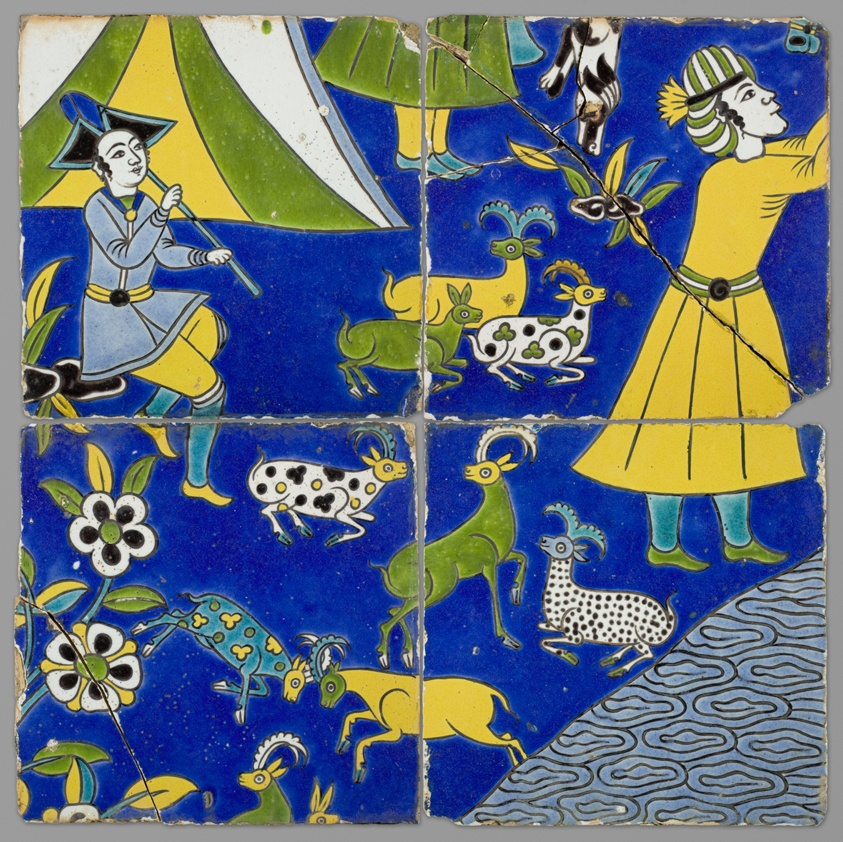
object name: Architectural fragment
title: Four Tiles with a Figural Scene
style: Islamic (culture or style)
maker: Iran; Isfahan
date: Safavid dynasty (1501–1722), 17th century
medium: Fritware with polychrom overglaze decoration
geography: Iran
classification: earthenware; asian art; ceramics; architectural fragment